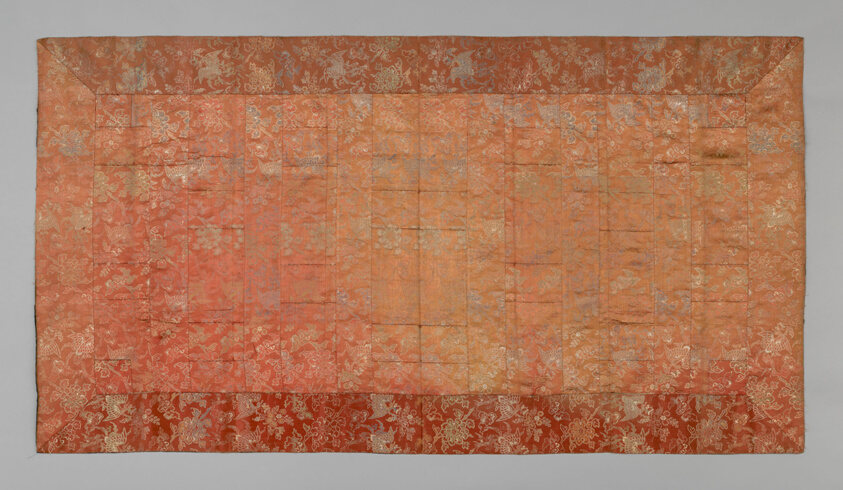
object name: Textile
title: Kesa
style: edo (japanese period)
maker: Japan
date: late Edo period (1789–1868), late 18th/early 19th century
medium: Silk and gold-leaf-over-lacquered-paper strip warp-float faced 4:1 satin weave with weft-float faced 1:2 'Z' twill interlacings of secondary binding warps and supplementary patterning wefts; lined with silk, plain weave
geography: Japan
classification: textile; weaving; costume; liturgical - buddhist